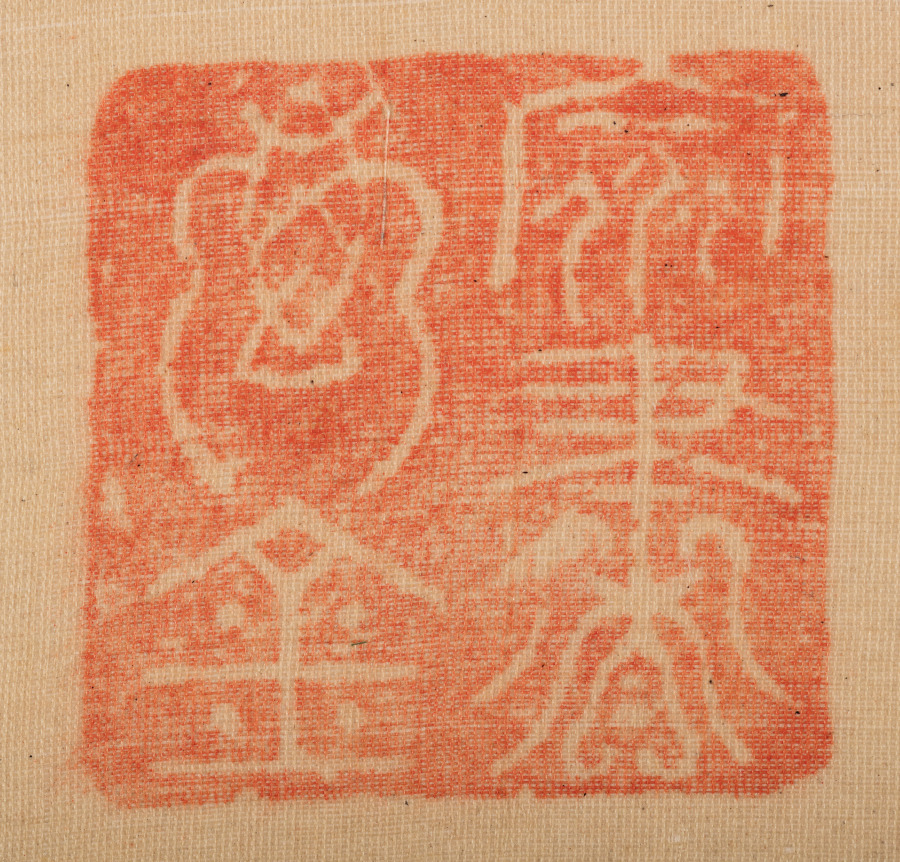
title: Orchids and Rocks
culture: Korea, Joseon dynasty (1392–1910)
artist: Yi Ha-eung (Korean, 1820–1898)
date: 1897–98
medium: Eight-panel folding screen; ink on silk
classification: Painting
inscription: Translation: [I] painted for the high minister Yangwon. [I] humbly request your corrections and advice [on my painting]. [By] an eighty-year old gentleman of rocks.)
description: Yi Ha-eung (1820−1898), the artist of this eight-panel folding screen, was one of the most influential men in late 19th-century Korea. Acting as the regent for his son, King Gojong (1852−1919), who ascended the throne at the age of thirteen, Yi ruled Korea from 1866 to 1873. In addition to his illustrious political career, Yi was also recognized as one of the most celebrated artists who led the revival of literati art in late 19th-century Korean art. In particular, he was recognized as the master of orchids, one of the “Four Gentlemen” (plum, orchid, chrysanthemum, and bamboo) themes. Solely relying on monochrome ink, Yi depicted the curvilinear silhouettes of cymbidium orchid leaves dramatically hanging down from cliffs. Growing in wilderness and redolent with fragrance, orchids were often associated with the perseverance of principled gentlemen, and thus became one of the most popular subjects of scholar-artists' paintings.On the upper right corner of the far left panel, Yi wrote a short inscription stating that he painted the work at the age of 80.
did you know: The artist of this elegant painting is the formidable politician Yi Ha-eung (1820–1898), who is known for a seclusion policy that aimed to protect Korea and its sovereignty from foreign influences.